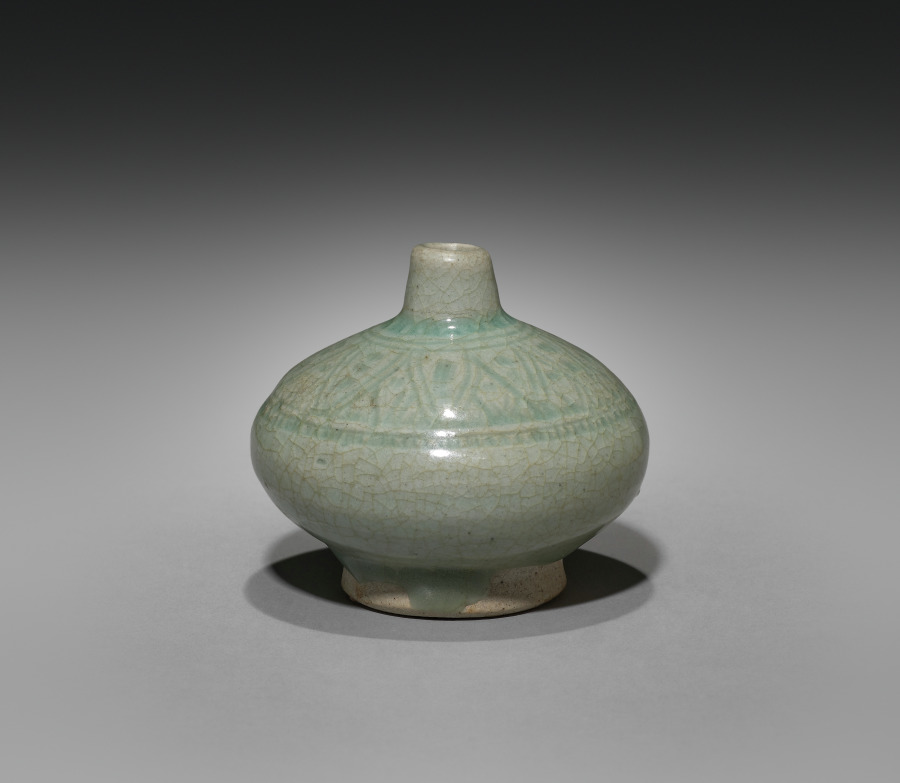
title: Small Jar: Sawankhalok Ware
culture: Thailand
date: 1300s–1400s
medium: porcelain with celadon glaze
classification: Ceramic